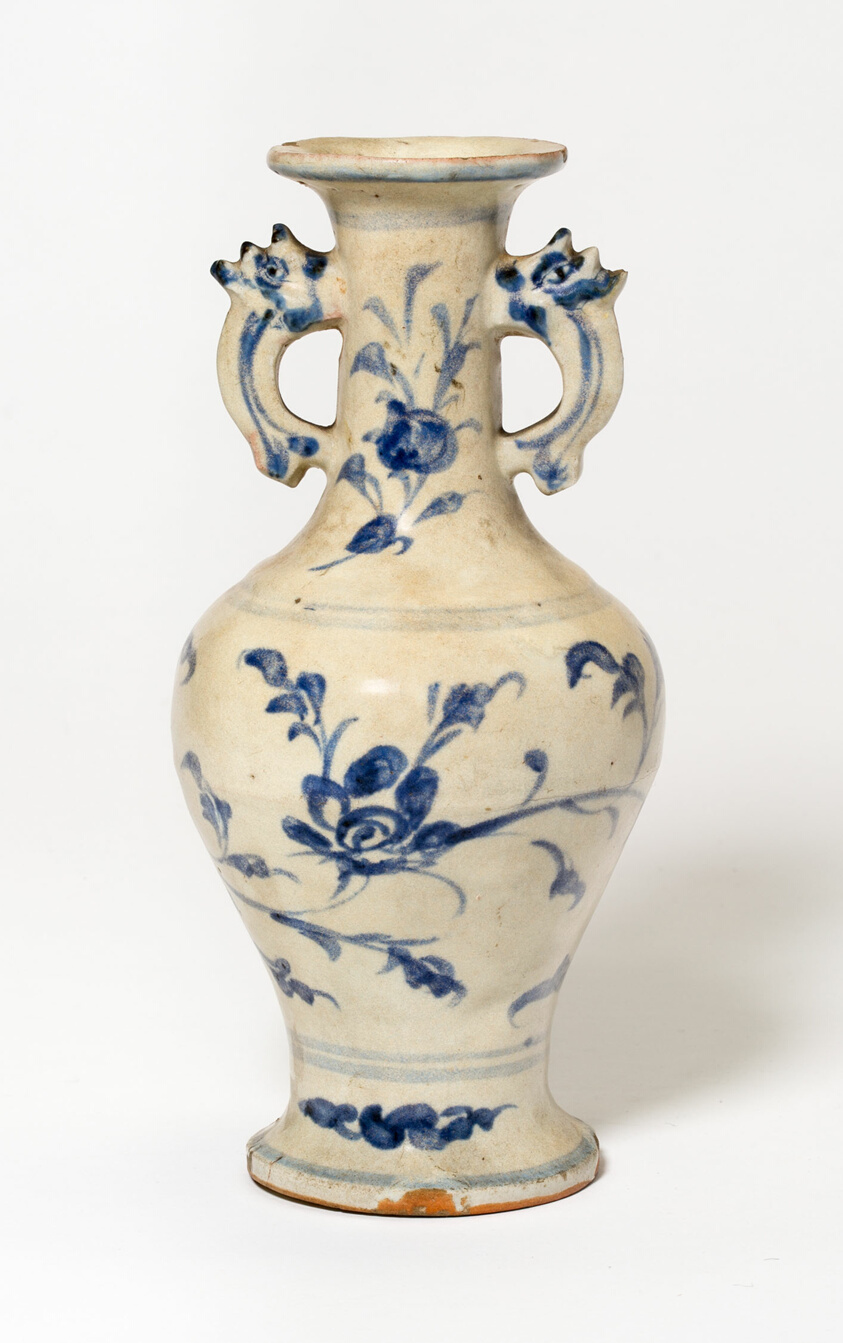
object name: Vessel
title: Vase with Dragon Handles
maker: China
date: Ming dynasty (1368–1644)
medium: Porcelain painted in underglaze blue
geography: China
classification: porcelain; asian art; ceramics; vessel